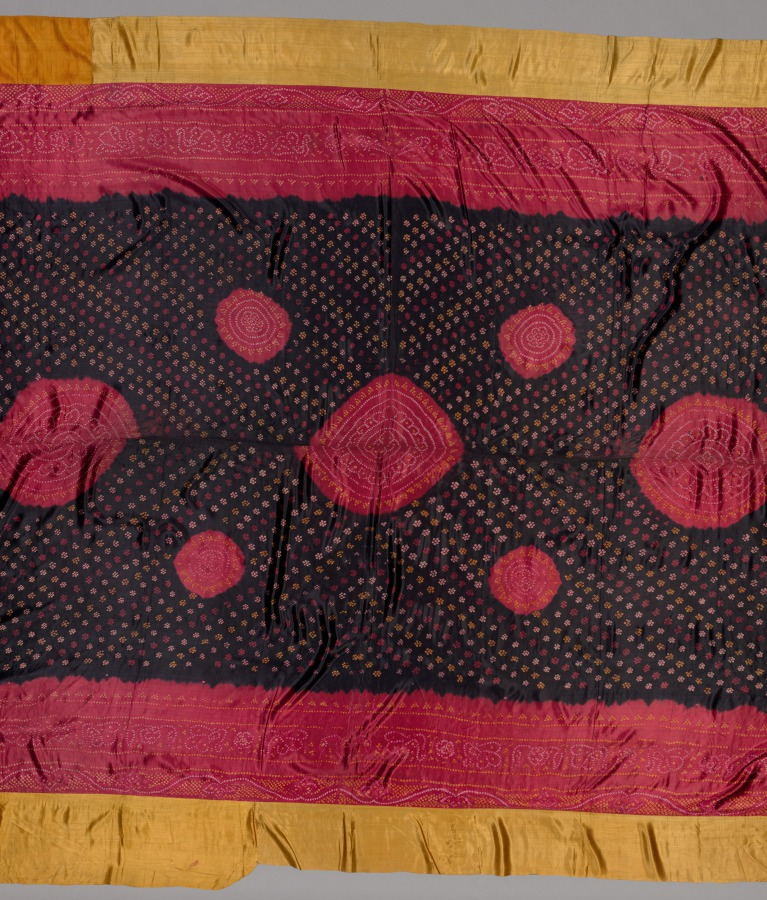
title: Indian Textile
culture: India, 19th - early 20th century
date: 1800s - early 1900s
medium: satin, tied and dyed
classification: Textile